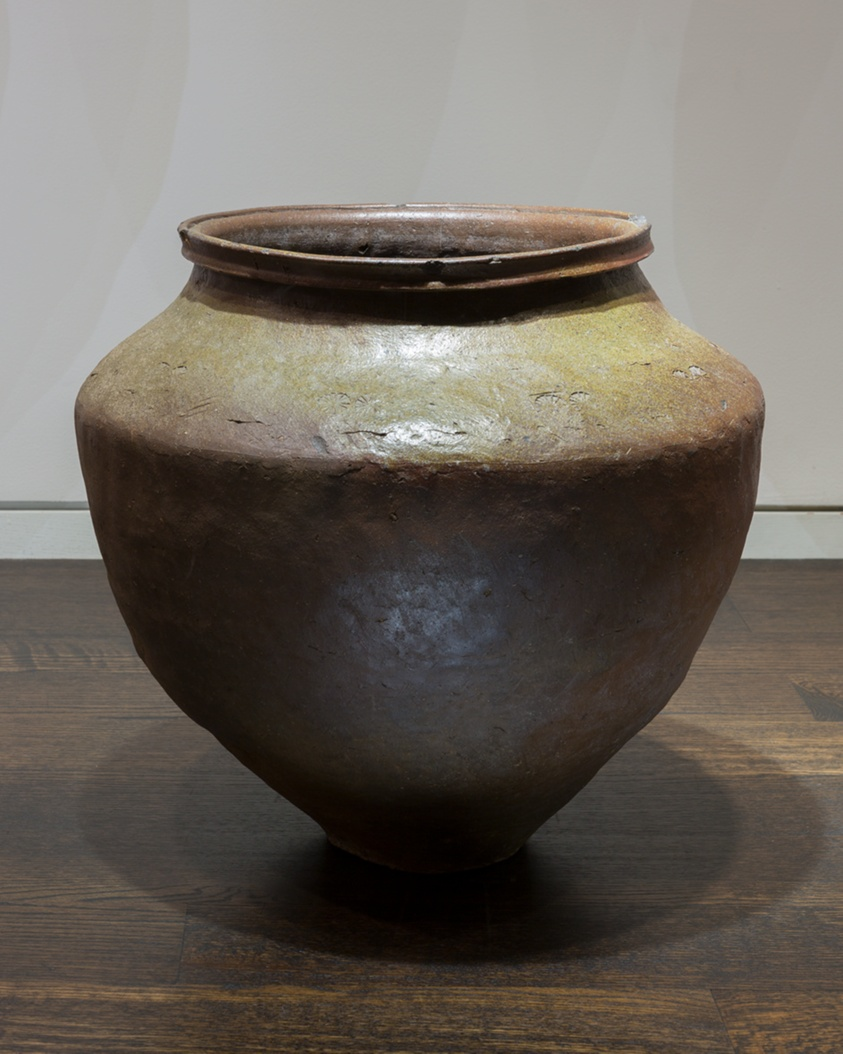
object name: Vessel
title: Tokoname-Ware Jar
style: Japanese (culture or style)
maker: Japan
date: 14th century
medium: Stoneware with ash glaze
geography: Japan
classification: stoneware; ceramics; asian art; vessel